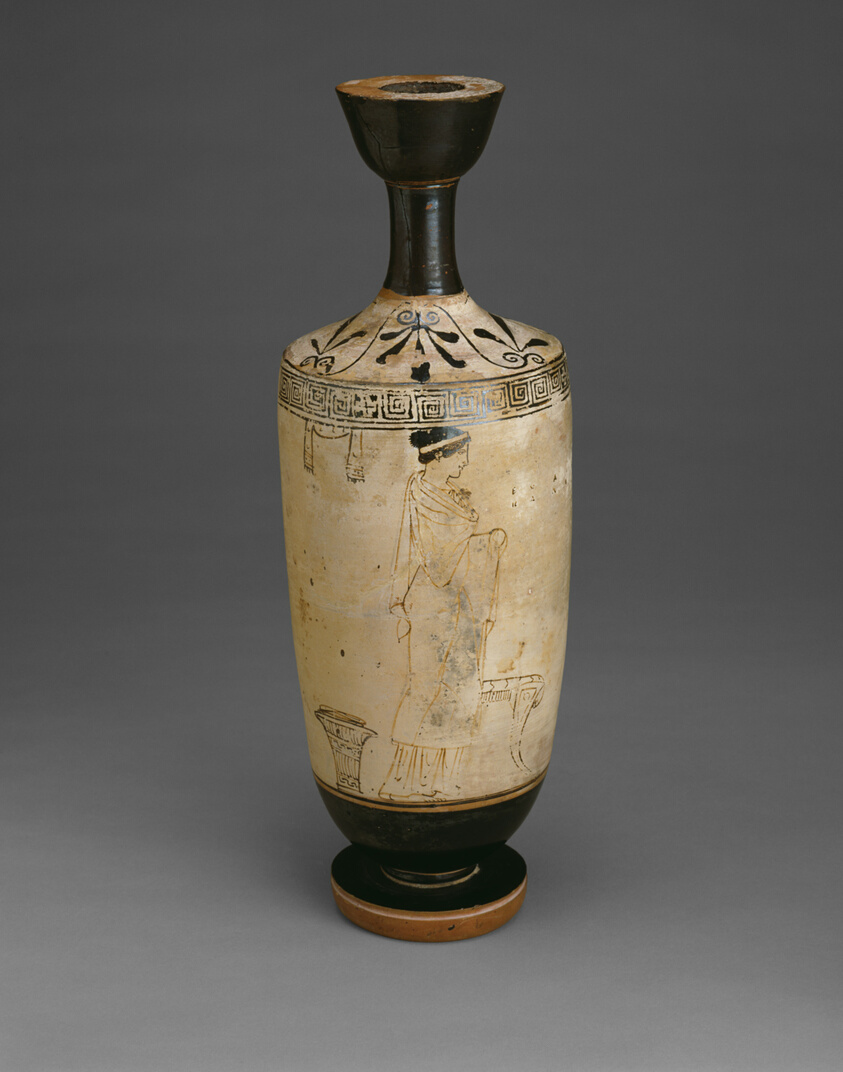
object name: Funerary Object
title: Lekythos (Oil Jar)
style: high classical, Classical, attic, white-ground, ancient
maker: Greek; Athens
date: about 440 BCE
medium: terracotta, white-ground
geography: Athens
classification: vessel; earthenware; ceramics; ancient art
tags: writing